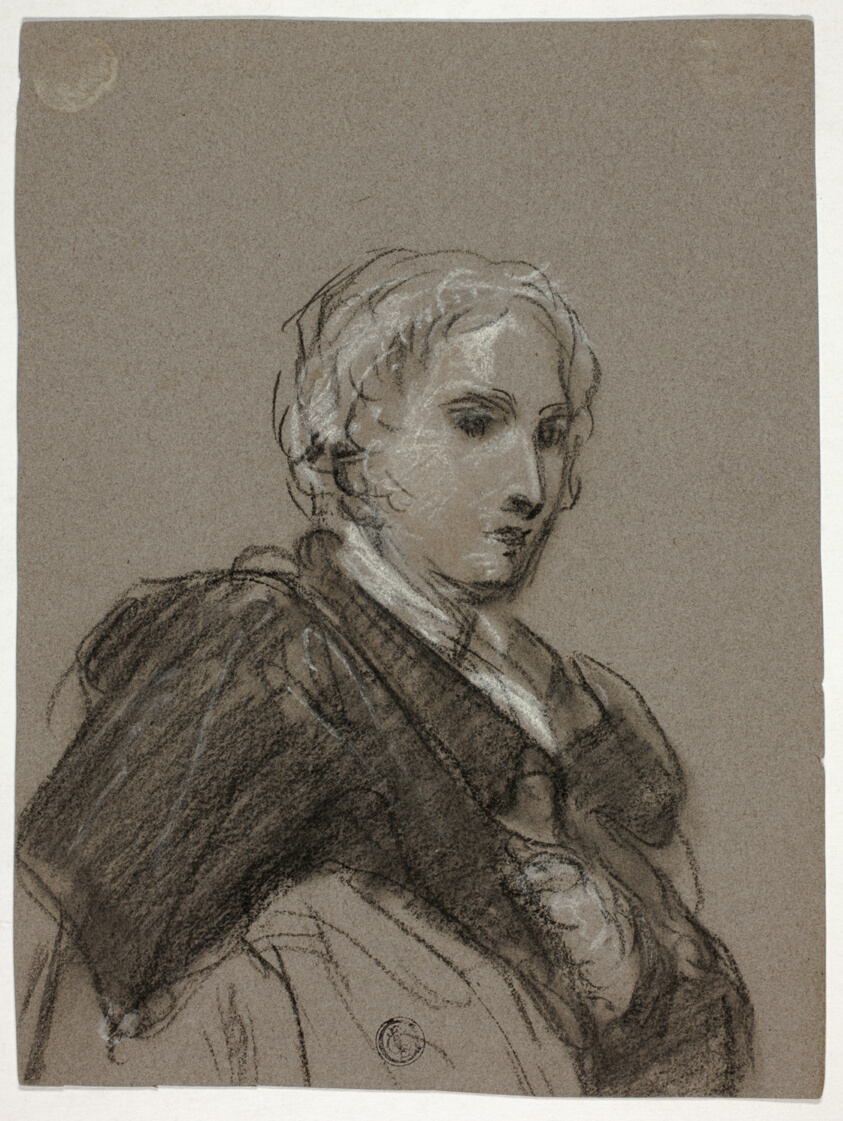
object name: Drawing and Watercolor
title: Bust of a Woman (recto); Draped Figure, Three-Quarter Length (verso)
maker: Thomas Barker (English, 1769-1847); or Thomas Jones Barker (English, 1815-1882)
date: c. 1790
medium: Charcoal, with stumping, heightened with white chalk (recto and verso), on dark pink wove paper with blue fibers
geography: England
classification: drawings (visual works); paper; charcoal; prints and drawing